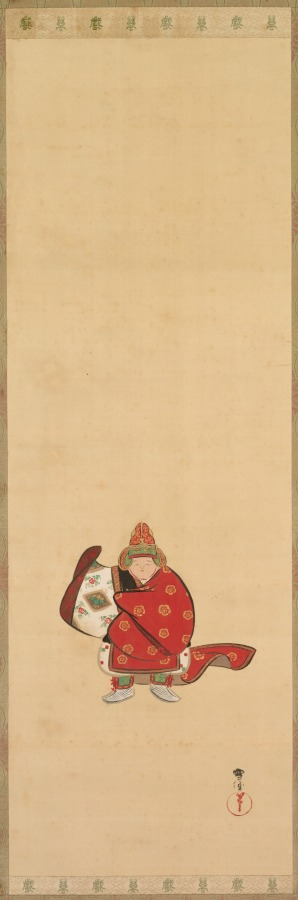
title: Bugaku Dancer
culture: Japan, Meiji period (1868–1912) to Shōwa period (1926–89)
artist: Kamisaka Sekka (Japanese, 1866–1942)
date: c. 1890–1942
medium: hanging scroll; ink and color on silk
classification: Painting